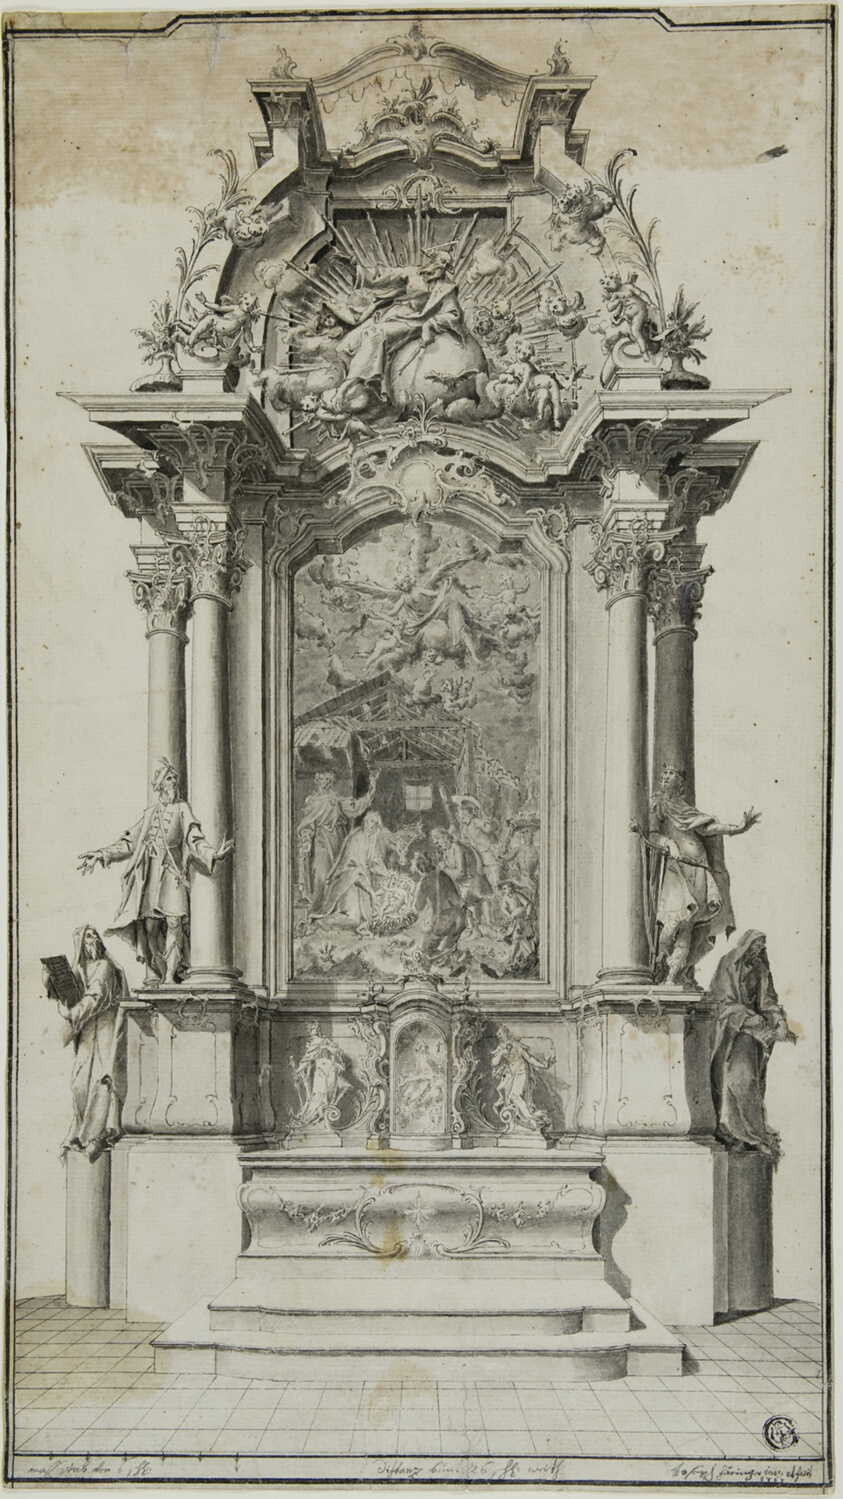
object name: Drawing and Watercolor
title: Study for an Altar Containing a Painting of the Adoration of the Shepherds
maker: Carl Joseph Haringer (Austrian, 18th century)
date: 1767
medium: Pen and black and gray ink and brush and gray wash on ivory laid paper, laid down on ivory wove paper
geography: Austria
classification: ink or chalk wash; drawings (visual works); prints and drawing